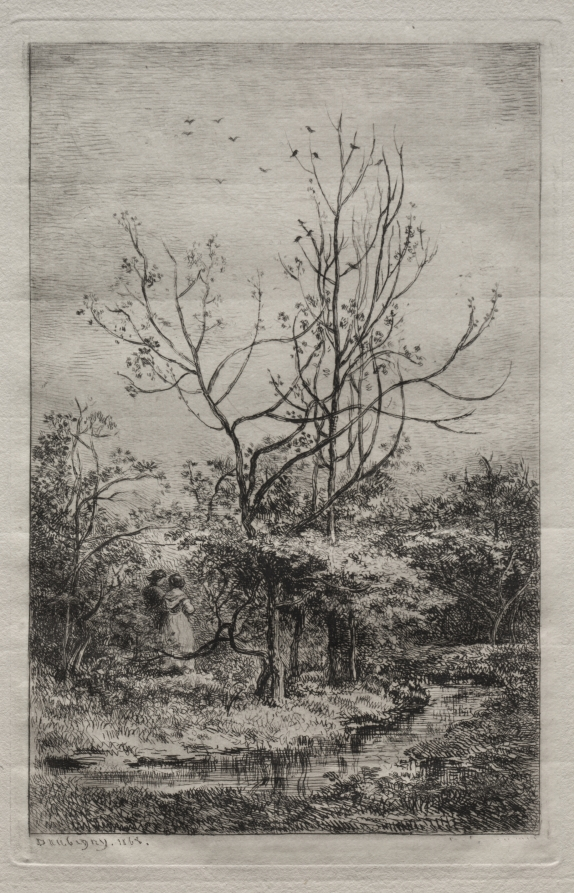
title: The Orchard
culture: France, 19th century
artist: Charles François Daubigny (French, 1817–1878)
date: 1868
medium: etching and drypoint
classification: Print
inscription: signed, lower left, in plate: Daubigny 1868